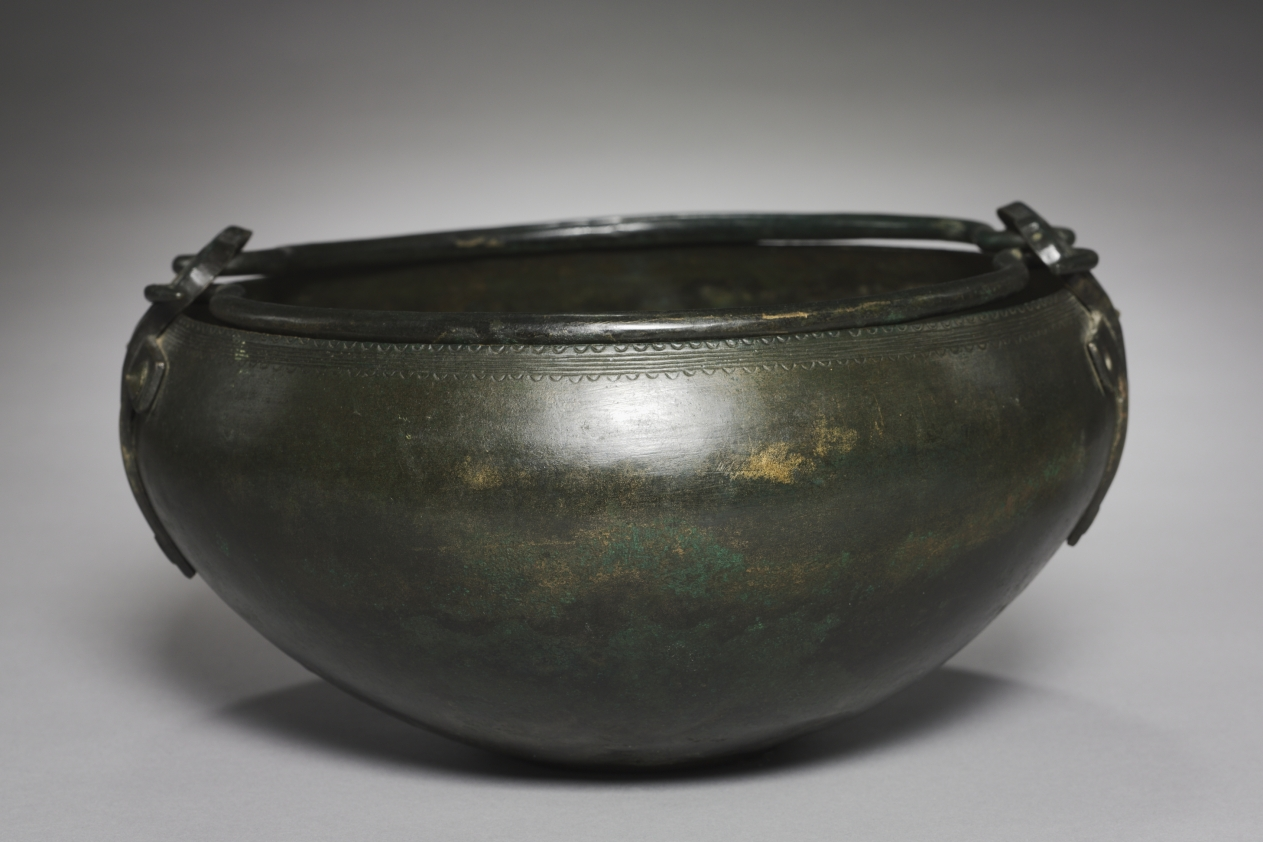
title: Ritual Cauldron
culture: Hungary, Bronze Age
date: c. 1000–900 BCE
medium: bronze, hammered, cast and wrought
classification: Metalwork